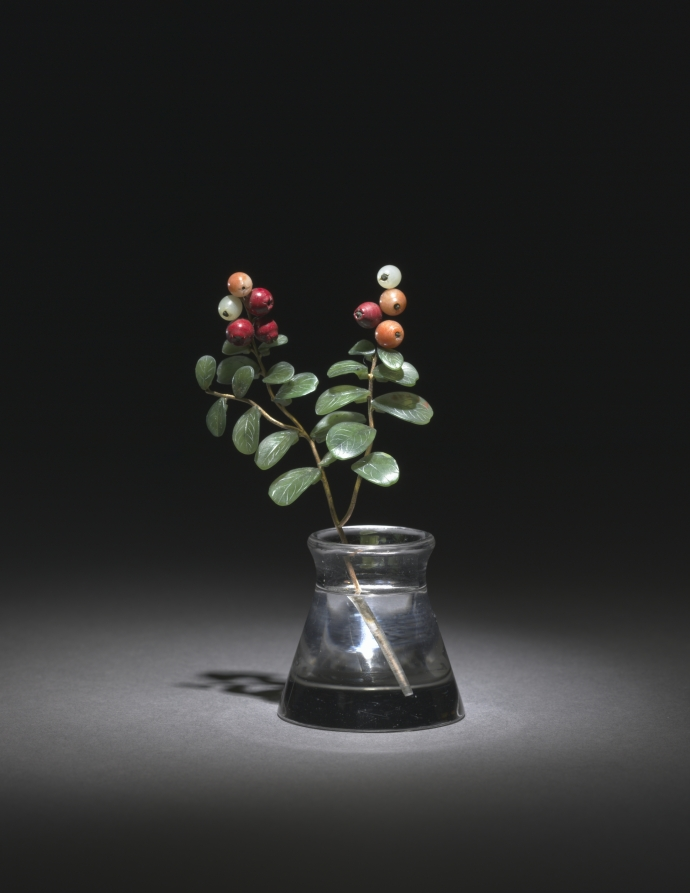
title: Flower Study of a Lowbush Cranberry or Lingonberry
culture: Russia, St. Petersburg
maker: House of Fabergé (Russian, 1842–1918)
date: c. 1885–1915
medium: chalcedony, jade, rock crystal, gold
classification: Miscellaneous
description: This flower study depicts a lowbush cranberry or lingonberry. To achieve a naturalistic effect of ripening fruit, Fabergé varied the coloring of the berries. Some are made of chalcedony in hues of milky white to represent unripe berries, while others appear in deep reddish agate to represent ripe ones. Fabergé’s inspiration for his flower studies is said to have come from the floral brooches of precious stones that were made in the 1700s for Catherine the Great as well as from the Japanese art of flower arranging, known as ikebana. Fabergé’s flower studies were given as intimate gifts to friends by the tsarina and others in the court. She also liked to take them around to wherever the imperial family was residing as a reminder of spring during the harsh Russian winters.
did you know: The stems of Fabergé’s flower studies are set into little basins carved from rock crystal to resemble pots of water.